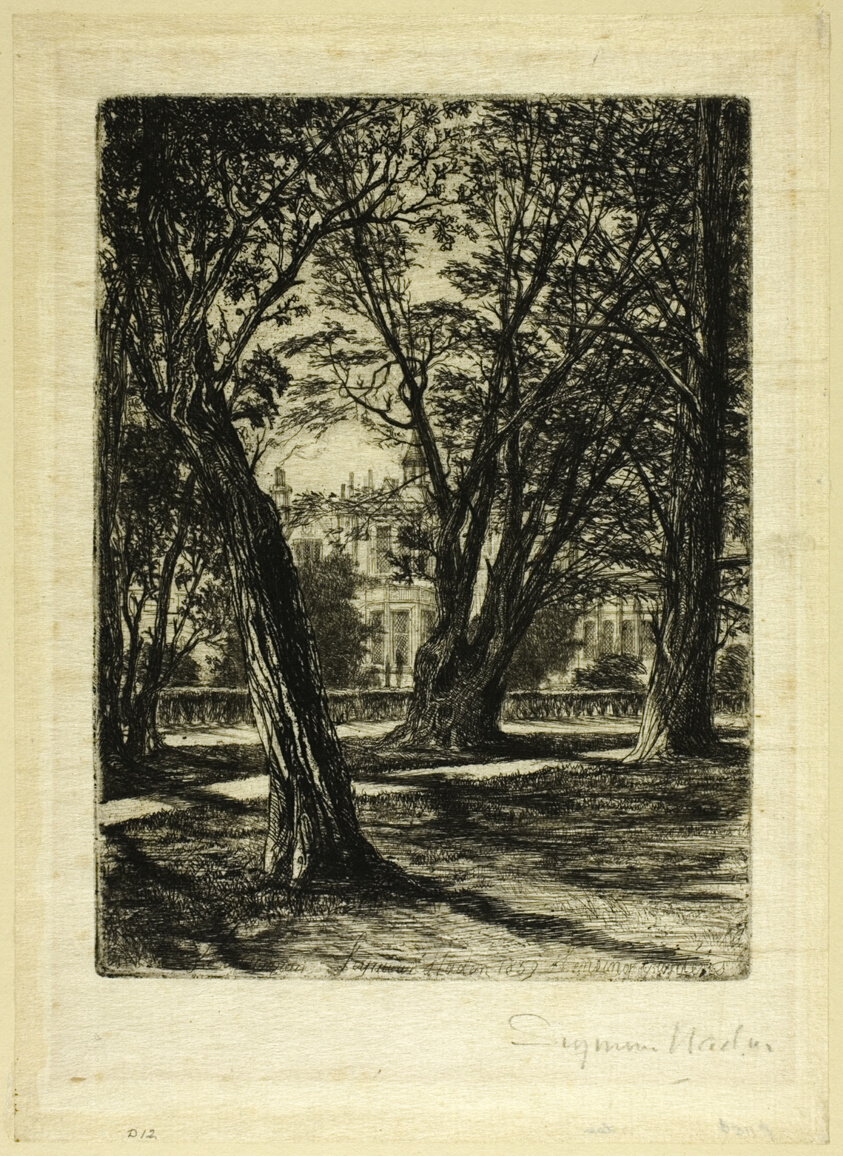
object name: Print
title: Kensington Gardens, No. I (small plate)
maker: Francis Seymour Haden (English, 1818-1910)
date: 1859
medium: Etching on ivory wove paper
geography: England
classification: etching; print; prints and drawing